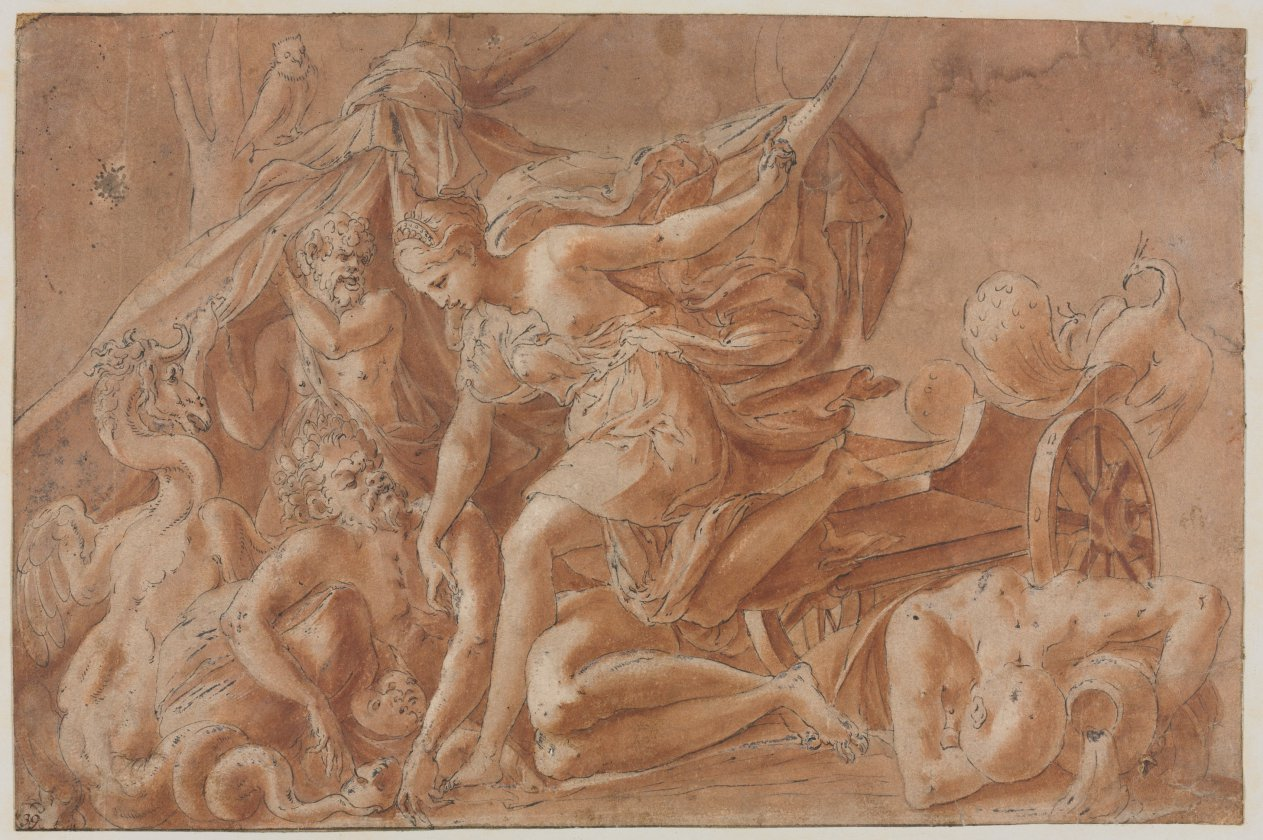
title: Copy after Primaticcio's Juno Awakening Sleep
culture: France, 16th century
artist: copy after Francesco Primaticcio (Italian, 1504–1570)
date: after 1535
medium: pen and black ink (with point of brush?) and brush and red-brown wash (red chalk wash?), heightened with lead white (partially oxidized); framing lines in brown ink with traces of gold paint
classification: Drawing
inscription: lower left, in brown ink: 39 ; RECTO OF SECONDARY SUPPORT, lower center, in brown ink: Federigo Zucchero / Born 1539 Died 1609 ; lower left, in graphite: Identical / Weak Copy after Uffizi drawing (see Gernsheim #1573) [22 x 33 cm]. [brackets part of inscription] / by Primaticcio . ; lower left, in graphite: (22.2 x 33.5) ; lower right, in graphite: Cotton, Colln ; lower right, in graphite: A 5289